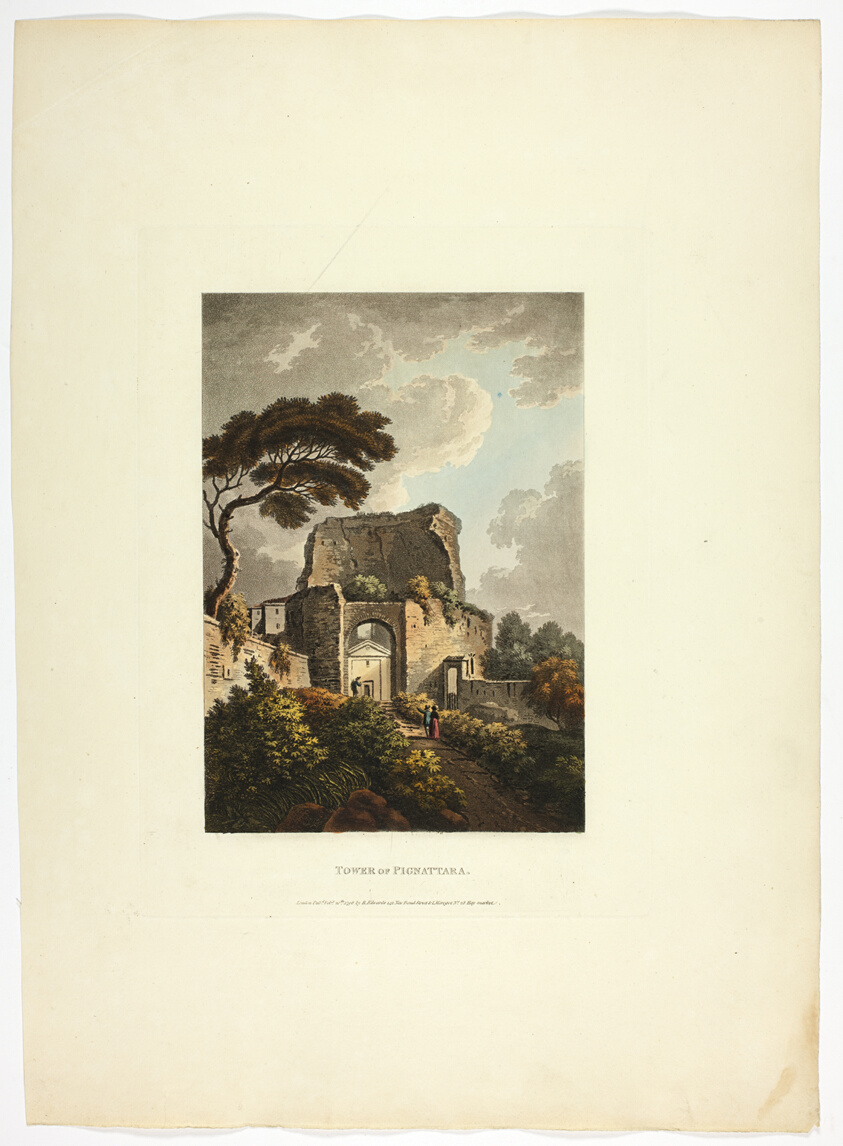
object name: Print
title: Tower of Pignattara, plate twenty-two from the Ruins of Rome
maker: M. Dubourg, (English, active 1786-1838); published by J. Merigot (Italian, Unknown)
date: published February 20, 1798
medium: Hand-colored aquatint on paper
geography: England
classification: aquatint; print; prints and drawing